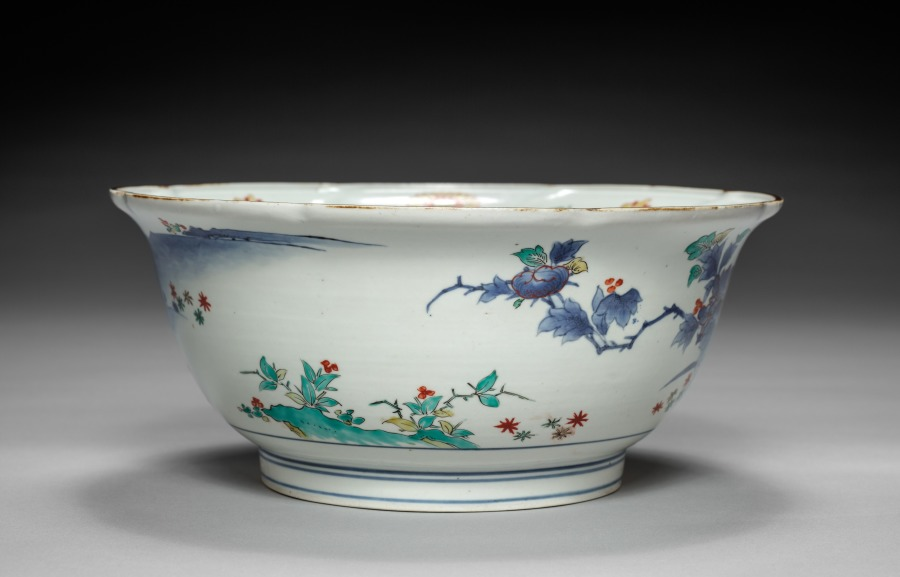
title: Bowl with Lion and Flowers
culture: Japan, Edo period (1615–1868)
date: 1700s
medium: porcelain, molded, with underglaze blue and overglaze color enamel (Hizen ware, Kakiemon type)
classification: Ceramic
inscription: 金